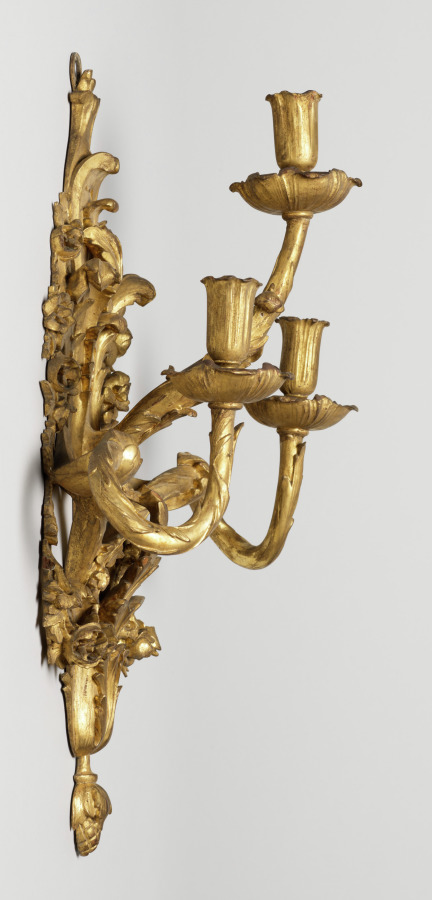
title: Candle Bracket (2 of 2)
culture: France, Transitional Style, Louis XV to Louis XVI, 18th century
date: c. 1765–1775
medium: gilded wood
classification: Furniture and woodwork